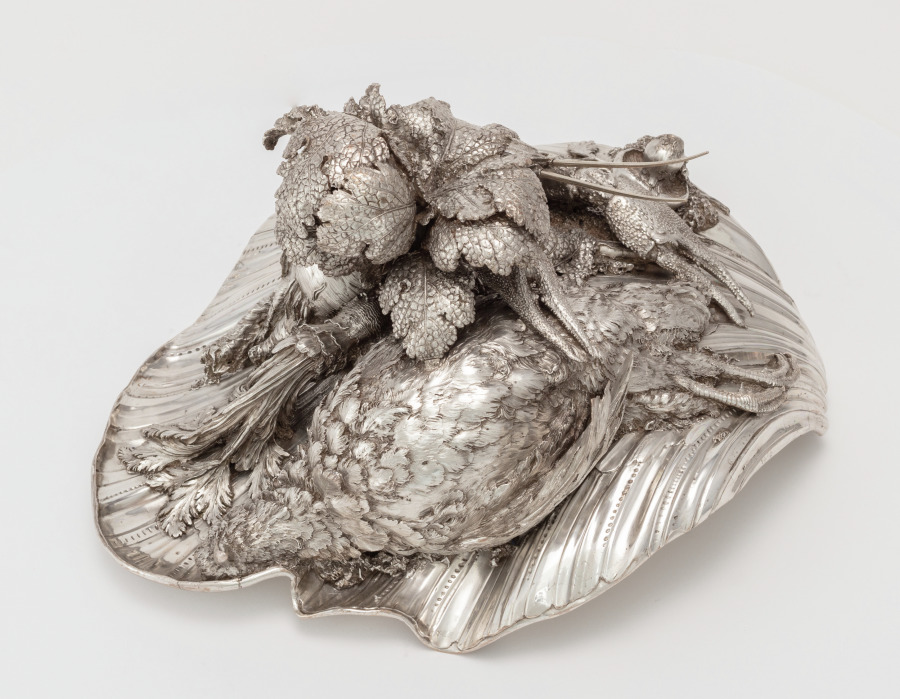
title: Cover for a Tureen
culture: France, Paris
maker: Henry Adnet (French, 1745)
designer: Juste-Aurèle Meissonnier (French, 1695–1750)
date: 1735–38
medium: silver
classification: Silver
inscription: engraved Meissonnier signature.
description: See entry for cover record 1977.182.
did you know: The langoustine, pigeon, and vegetables were cast using real examples giving the silver copies lifelike detail and appearance.